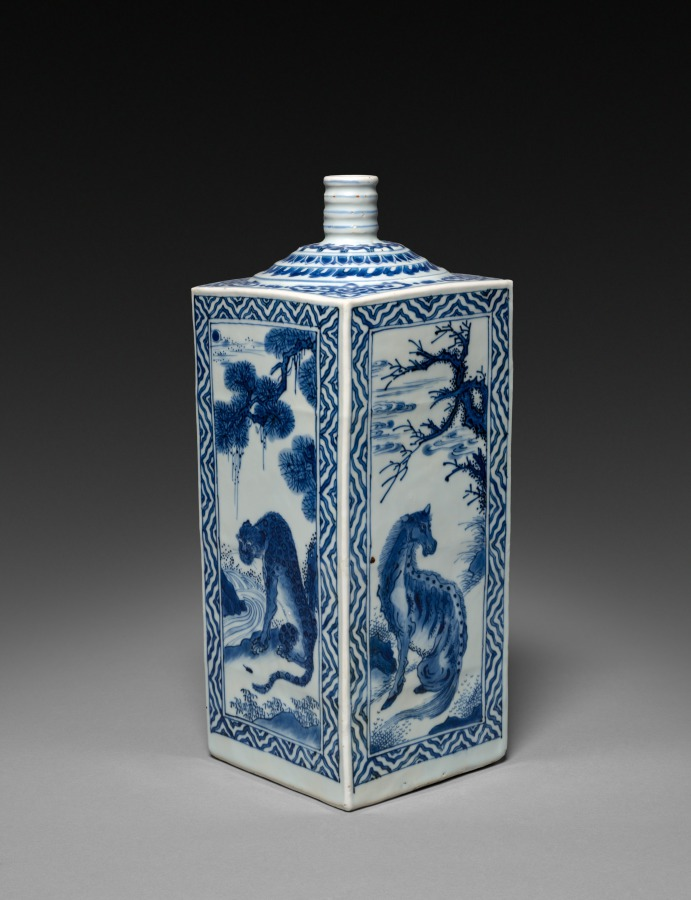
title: Transitional Blue-and-White Square Bottle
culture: China, Jiangxi province, Jingdezhen kilns, Ming dynasty (1368-1644), Chongzhen reign (1628-44) or Qing dynasty (1644-1911), Kangxi reign (1662-1722)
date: 1628–1722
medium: Porcelain with underglaze cobalt blue decoration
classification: Ceramic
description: The shape of this flask derives from European gin bottles. Its decoration in brilliant shades of blue with fantastic animal motifs—such as a leopard, the mystical qilin, a horse, and another imaginary beast—is characteristic of porcelain of the transitional period between the Ming and Qing dynasties when potters lost imperial patronage and experimented to find new clients in China and abroad.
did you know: This flask's square shape and design represents a departure from the earlier imperial Ming dynasty style, which is mostly ornamental and symmetrical.